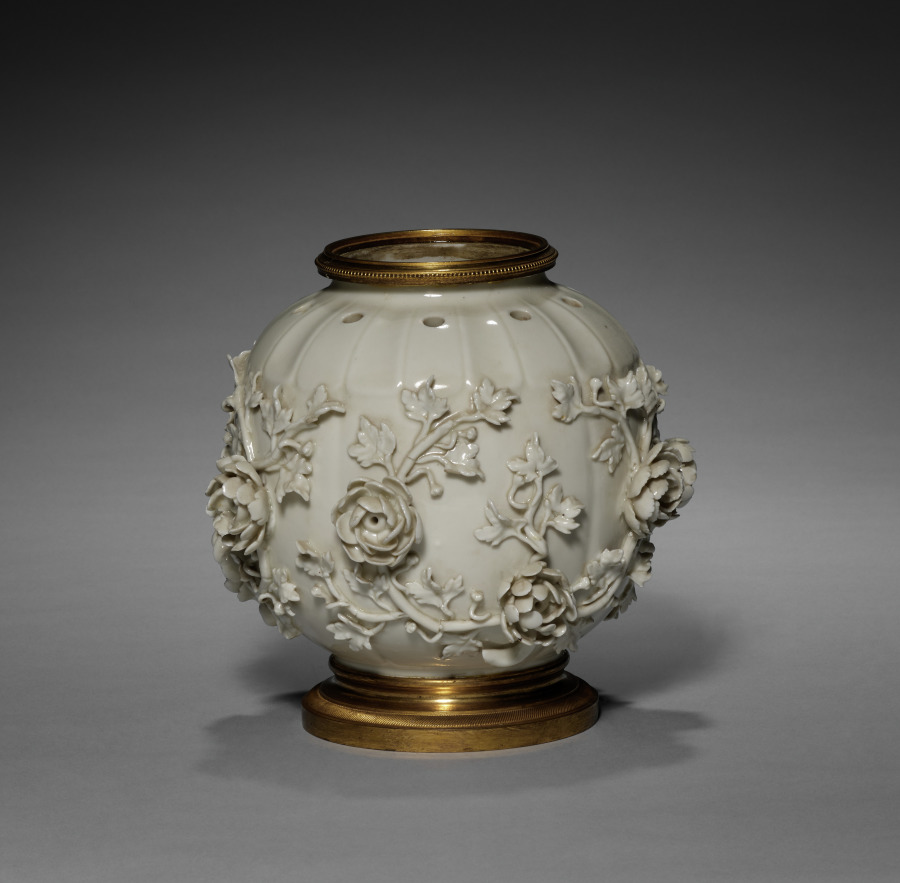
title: Potpourri Vase with Cover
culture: France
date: c. 1860–80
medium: blanc-de-chine porcelain; gilt bronze mount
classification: Ceramic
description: This vase was likely made by the celebrated Parisian ceramics firm of Edmé Samson (1810-91). To cater to the resurgence in taste for 18th-century designs, the Samson firm specialized in making reproductions of rare 18th-century European porcelains, especially those from firms that had already copied Chinese porcelains. In this case, this vase's design is taken from models produced by the St. Cloud factory in the 1750s after earlier Qing dynasty Chinese ceramics. However, the telltale sign that this vase is made by Samson and not St. Cloud is that the original would have been made from a soft-paste porcelain (fired at a lower temperature), while this example is made of hard-paste porcelain (fired at the highest temperature).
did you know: Potpourri vases always have holes in the top to let the scent of dried spices and flowers contained within freshen the air around them.